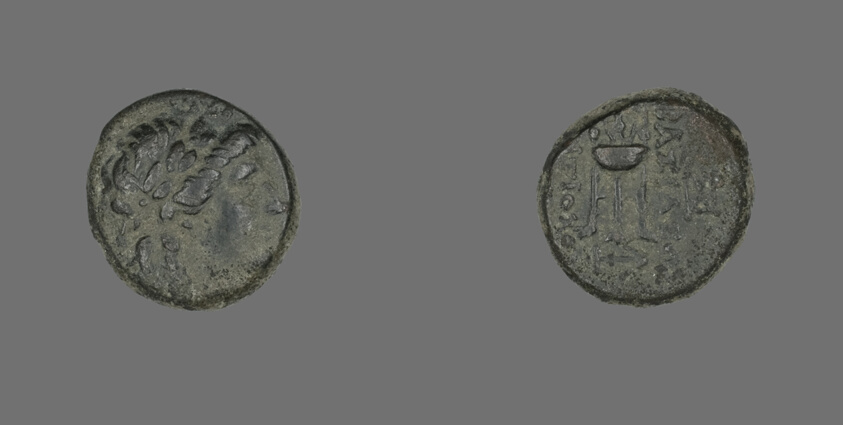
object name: Coin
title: Coin Depicting the God Apollo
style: greek, ancient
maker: Greek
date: 261-246 BCE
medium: Copper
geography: Ancient Greece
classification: coin; ancient art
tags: gods (deities)